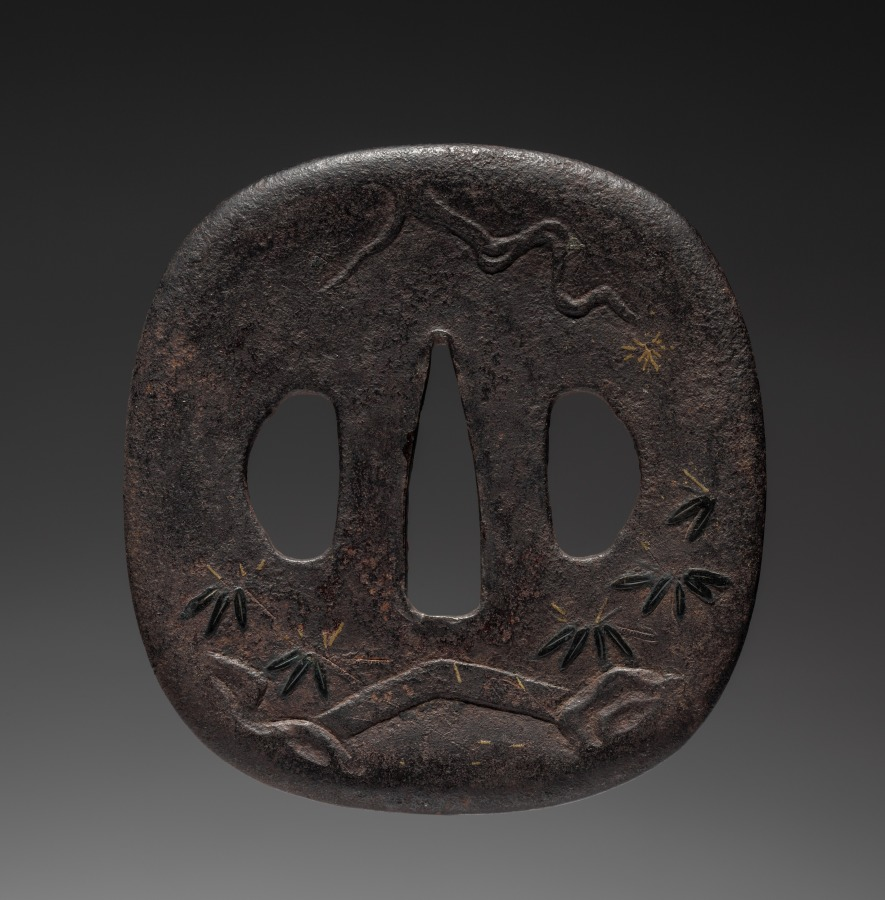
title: Sword Guard (Tsuba) with Landscape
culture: Japan, possibly Edo period (1615-1868)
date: c. 1615–1868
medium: iron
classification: Arms and Armor